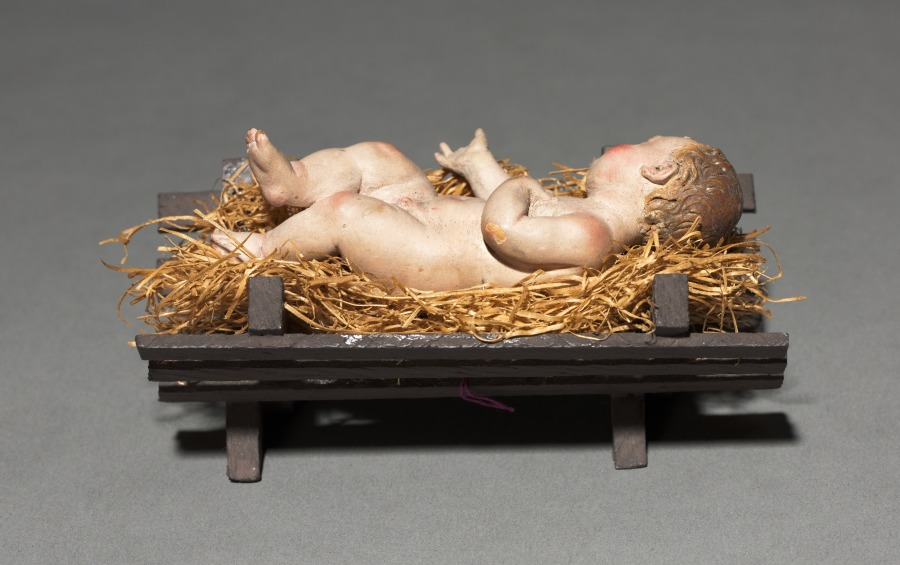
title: Figure from a Crèche: Infant Christ with Crib and Straw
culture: Italy, Naples, late 18th-early 19th century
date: 1780–1830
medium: painted terracotta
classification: Sculpture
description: The practice of creating scenes of the Nativity for the home dates from the early 1700s in Italy, where people began to set up doll-like figures of about a foot or less in height. The custom was particularly popular in Naples around 1800, where crèche scenes (crèche means cradle, or crib) included many figures, whose heads and hands of painted terracotta, stuffed cloth bodies, and clothing adapted from contemporary local costumes gave them an amazingly realistic character. Representations of the birth of Jesus can be traced to the first few centuries of Christianity. Both living creatures and sculptural depictions of them were used from early times. By the late middle ages it was customary to create life-size figures of wood or stone, naturalistically painted, to represent the characters who participated in the events of Jesus's early life. These sculptures were then arranged in scenes illustrating one or both of the most important of these events, the Adoration of the Shepherds and the Adoration of the Magi-the three kings from the East who came to pay homage to the Christ child. Used in churches, these large figures were especially popular in Italy, Central Europe, Spain, and Portugal. This Object in Focus presentation was organized by Henry Hawley, Curator of Renaissance and Later Decorative Arts and Sculpture.